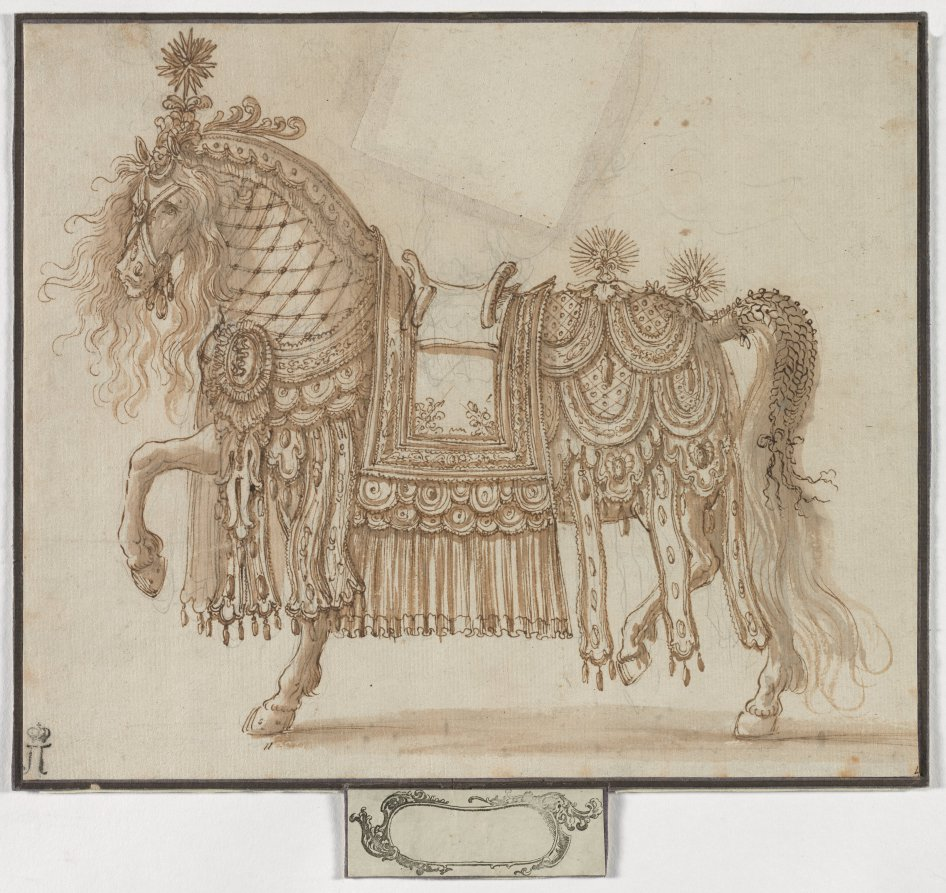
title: Parade Horse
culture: Italy, 17th century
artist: Anonymous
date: 1619?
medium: pen and brown ink and brush and brown wash over graphite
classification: Drawing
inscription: lower right, in brown ink: [4?] [cropped] ; VERSO OF TERTIARY/QUATERNARY SUPPORTS, center, in brown crayon: 227 / VIII [upside down] ; lower center, in graphite: 29/4/1931 Boerner No 8 / Eremitage from Count Kobenzl 1768 ; lower right, in graphite: Stefano della Be [cropped] ; lower right, in graphite: 35[1?]8. -